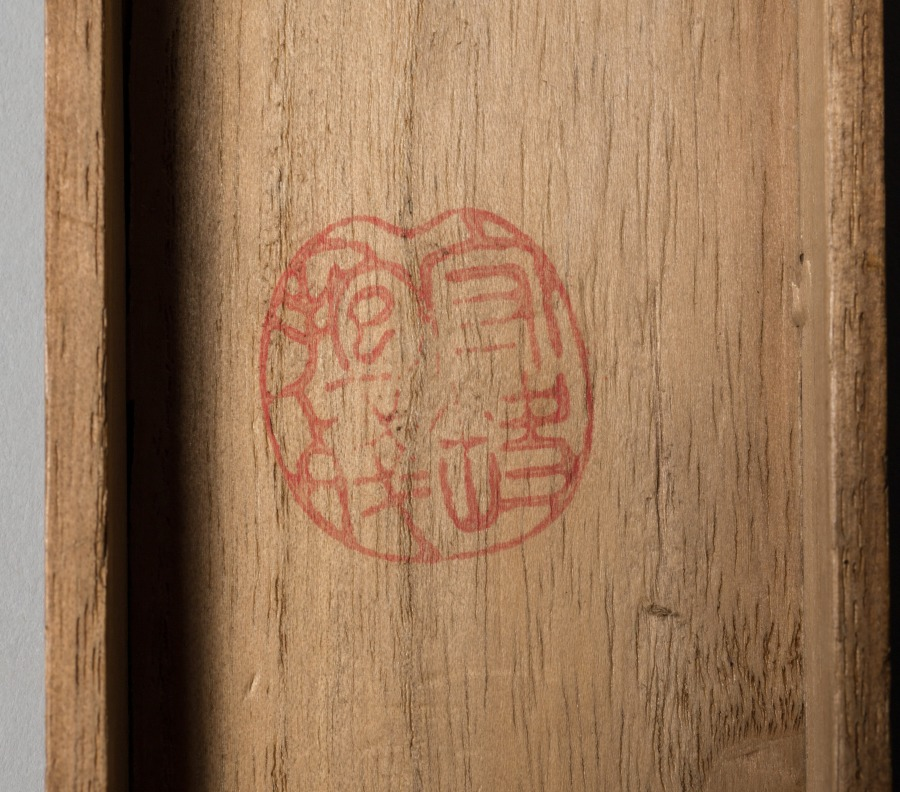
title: Section of an Illustrated Tale of Genji Poetry Contest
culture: Japan, Muromachi period (1392–1573)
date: 1400s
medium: section of a handscroll mounted as a hanging scroll; ink on paper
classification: Painting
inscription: 四十六番 左 ひげくろの大将 心さえ空にみだれし雪の［も」夜に ひとりさえつるかたしきの袖／ 四十七番 うきことを思ひさわ げばさまざまに くゆるけむりぞ いとど たち そふ／ 四十八番 すがくれてかず にも あらぬ かりのこを いづかたにかはとりかくすべき／ 右 雲井のかり かぎりとてわすれがたきを わするるも こや世に なびくこころな るらむ／ あさきなを いひ ながしける かわ ぐちは いかが もらしし せきのあらがき／ あわれをもいかに しりてか なぐさ めむ あるや 恋しき なきや かなしきに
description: This hanging scroll was once part of a handscroll depicting a waka (thirty-one syllable verse) poetry contest between characters from the 11th-century literary classic Tale of Genji. In this section, a woman known informally as Kumoi no kari, or “Goose in Fog,” after a lovelorn line she hums in the novel, is pitted against Higekuro no taishō, or “General Blackbeard.” Three of his poems, numbered 46 to 48, from “The Handsome Pillar” chapter appear over his image. The subsequent three poems inscribed above Kumoi no kari are presented as her “responses,” and come from "The Plum Tree Branch", “New Wisteria Leaves”, and "Evening Mist" chapters.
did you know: General Blackbeard laments having smelly ash poured upon him by his angry wife in one of the poems.